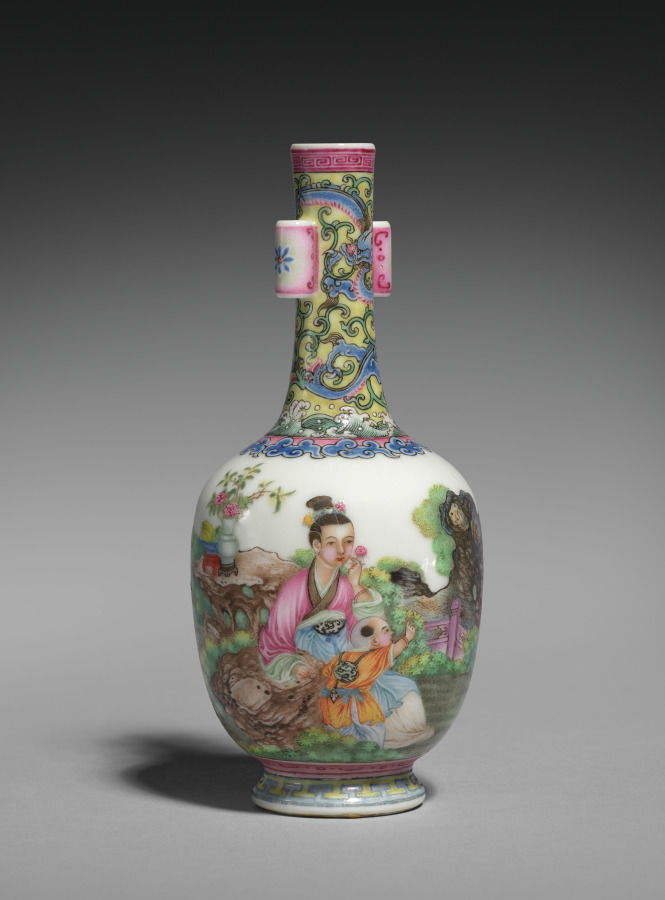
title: Vase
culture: China, Qing dynasty (1644-1911), Qianlong mark and reign (1736-95)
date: 1736–95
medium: Porcelain with decoration in colored fa-lang enamels, Guyuexuan ware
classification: Ceramic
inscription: 乾隆年製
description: The four-character mark on the base of this vase indicates that it was made in Jingdezhen and then sent to Beijing to be decorated in the imperial workshops by painters who were trained in using Western perspective and shading.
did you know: The child in orange has a bun above his ear, while the rest of his head is clean-shaven, like the other children’s.